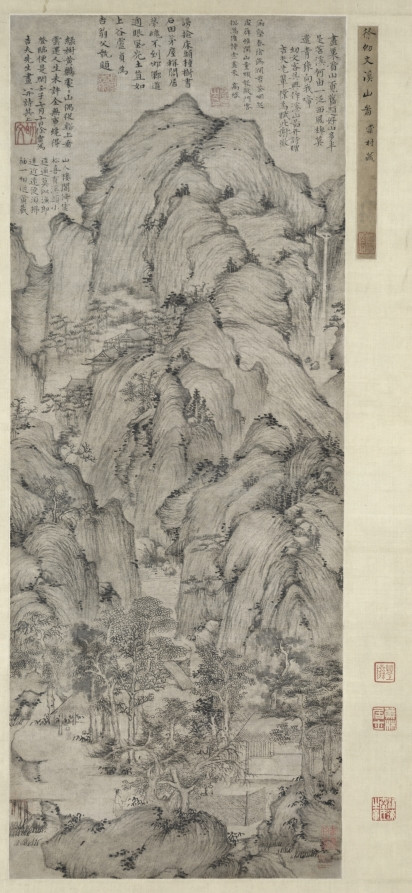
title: Streams and Mountains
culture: China, Yuan dynasty (1271-1368)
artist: Xu Ben (Chinese, 1335–1380)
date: 1372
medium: hanging scroll, ink on paper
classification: Painting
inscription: 綠樹黃鸝處處山， 偶從谿上看雲還。/ 人生未許全無事， 纔得登臨便是閑。 壬子七月十日徐賁為吉夫先生畫 並詩共上 [印] 幼文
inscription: Label on mounting probably by Liang Qingbiao 梁清標 (1620–1691).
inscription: 4 additional inscriptions and 9 additional seals: 1 poem of Xie Hui 謝徽 (c. 2nd half 14th c.); 1 poem and 1 seal of Gao Qi 高啟 (1336–1374); 1 poem and 1 seal of Lu Zhen 盧貞 (c. late 14th c.); 1 poem of Huang Zai 黃載; 3 seals of Liang Qingbiao 梁清標 (1620–1691); 1 seal of Wang Jiqian [C. C. Wang] 王季遷 (1907–2003); 3 seals unidentified.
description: Like many literati of the late Yuan and early Ming dynasties, Xu Ben was entangled with the perils of dynastic change as well as the ups and downs of his official career. It was mainly through the art of painting and poetry, as well as the ideal of reclusion, that he sought feelings of exhilaration and shared them with his friends. Xu created this monumental landscape during one of his periods of reclusion. His innumerable “hemp-fiber” texture strokes create a unifying rhythm among the towering mountains with tightly knit masses of rocks. Nestled among shady trees at the base of the mountain is a rustic retreat, which a scholar approaches on foot to visit with the hermit. Among the five inscriptions at the top of the painting is one by the artist himself. He dedicated the painting to someone named Jifu 吉夫 and recorded a poem in praise of mountains. Green trees, yellow orioles, everywhere are mountains; Aimlessly I return from the stream, where I watched the clouds. Man's life does not allow unbroken ease, But to be able to be high up in the mountain, this is leisure.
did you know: An attendant opens a reed gate to welcome the scholar with a walking stick approaching the rustic retreat.